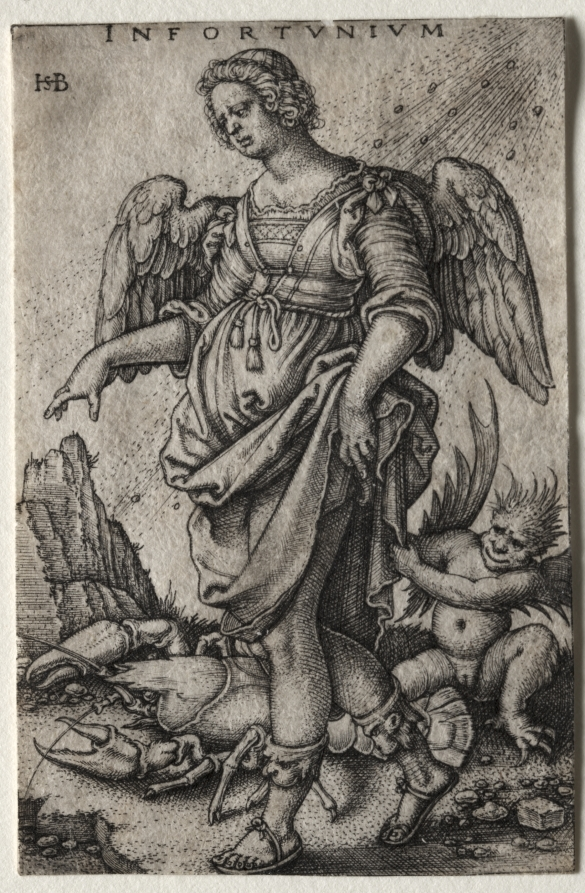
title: Misfortune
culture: Germany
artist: Hans Sebald Beham (German, 1500–1550)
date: c. 1541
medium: engraving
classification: Print